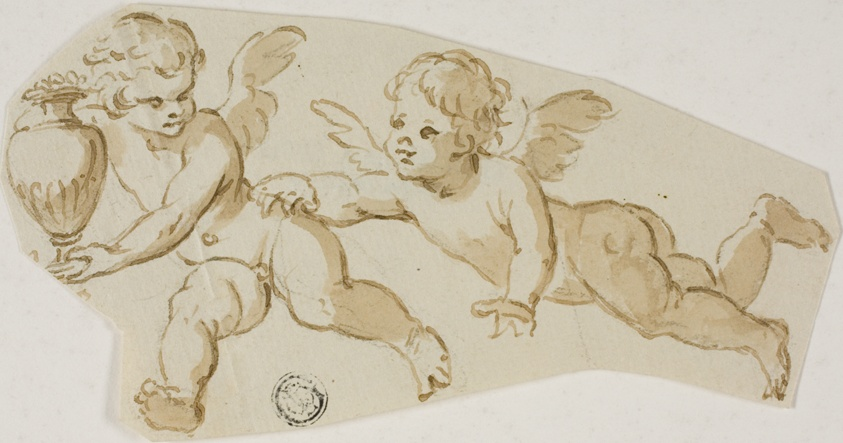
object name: Drawing and Watercolor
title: Putto Chasing Another Putto Carrying a Vase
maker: Unknown Artist; Italian, 1600-1699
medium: Pen and brown ink with brush and brown wash, over black chalk, on ivory laid paper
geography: Italy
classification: ink or chalk wash; drawings (visual works); prints and drawing